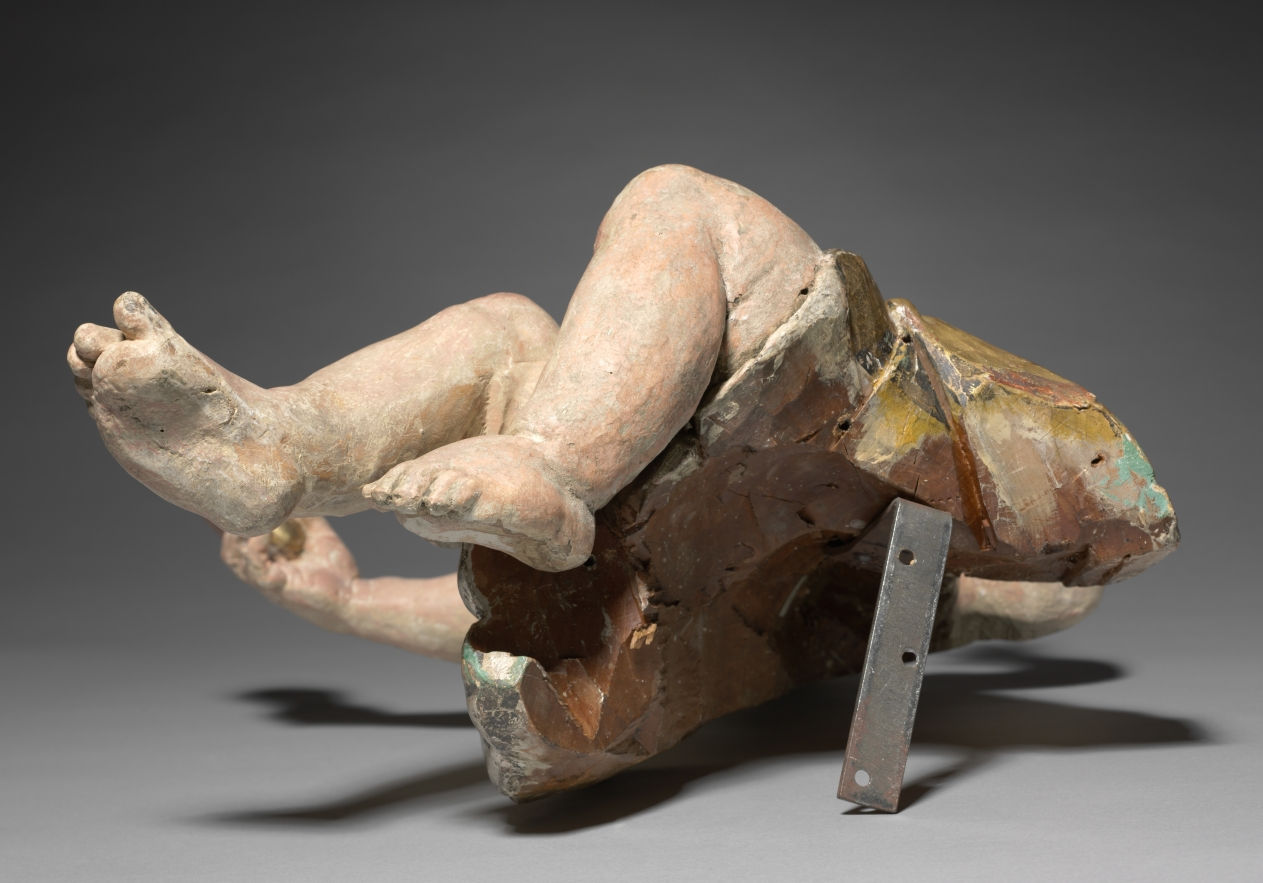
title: Putto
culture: Germany, near Bamberg, 18th century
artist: Ferdinand Tietz (Austrian, 1708–1777)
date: mid-1700s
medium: painted and gilded wood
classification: Sculpture